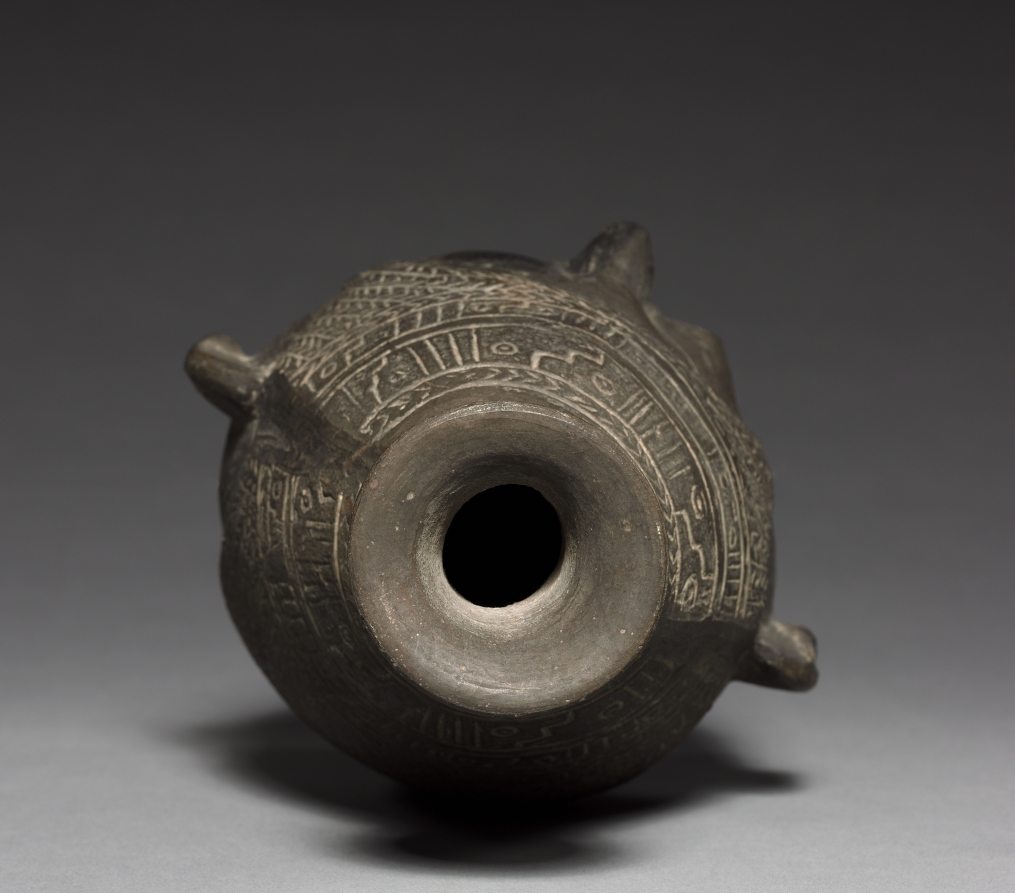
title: Bottle Vase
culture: Peru, Chimú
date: c. 1400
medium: black ware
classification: Ceramic